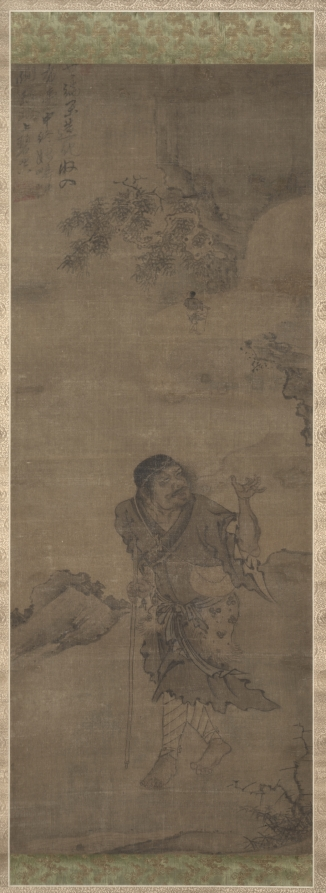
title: Li Tieguai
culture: China, Yuan dynasty (1271-1368)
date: 1300s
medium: Hanging scroll; ink and color on silk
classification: Painting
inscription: Inscribed in upper left corner: The universe which has no limit/ Is all collected in the cloth bag/ At the roadside which has no beginning or end/ One floats up to the blue sky.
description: It is said that Li Tieguai’s ethereal self visited the deified Laozi but when he returned, he found that his own body was burned. He had to inhabit the corpse of a person who used a crutch to walk, and thus gained his name Tieguai—the Iron Crutch. The painting depicts Li Tieguai after he took possession of the body, with the iron staff in his hand. As Li exhales, he blows a small Li Tieguai in the air, showing the immortal’s ability to send his spirit on journeys.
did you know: Li Tieguai is one of the Eight Daoist immortals.